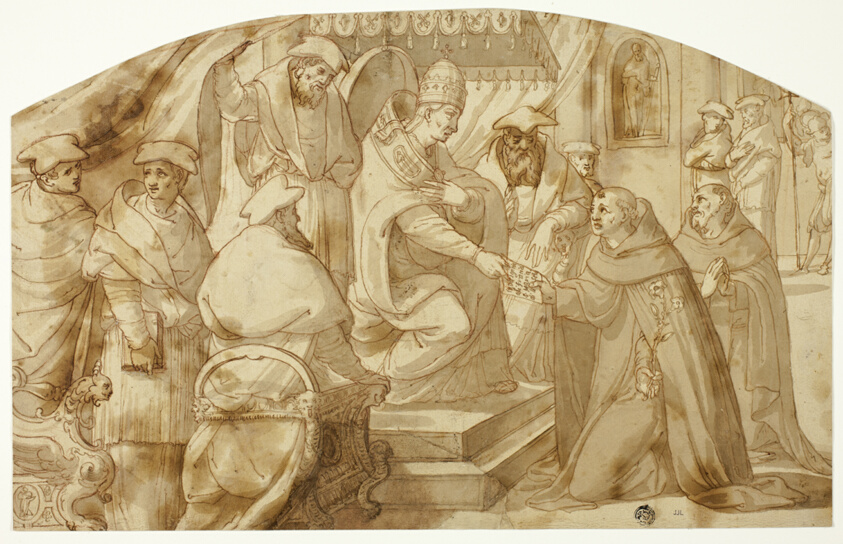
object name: Drawing and Watercolor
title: Pope Granting Saint Anthony of Padua a Bull of Indulgence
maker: Circle of Paolo Farinato; Italian, 1524-c.1606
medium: Pen and brown ink with brush and brown wash, over red chalk, on ivory laid paper, laid down on cream wove paper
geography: Italy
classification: ink with wash; drawings (visual works); prints and drawing